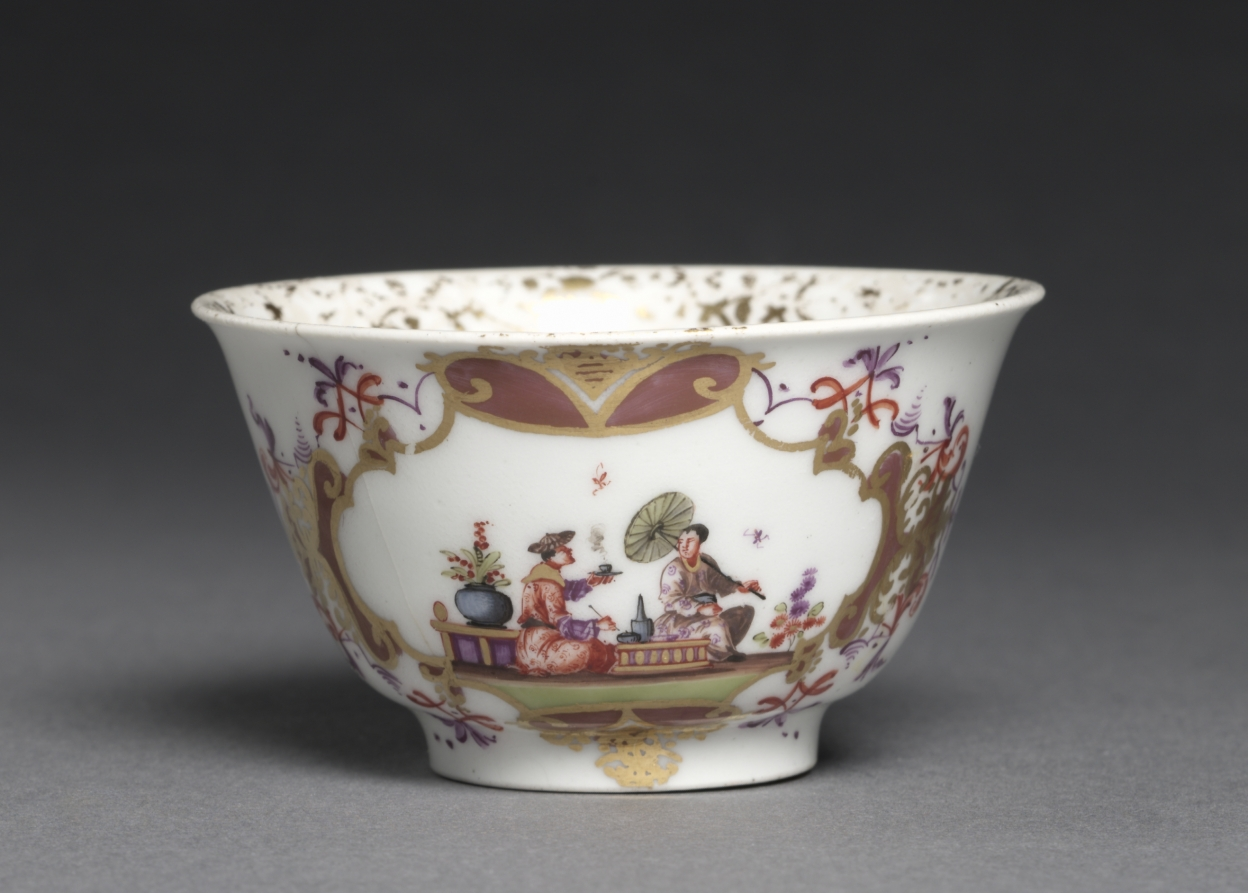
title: Cup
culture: Germany, Meissen, 18th century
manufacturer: Meissen Porcelain Factory (German, est. c. 1710)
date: c. 1725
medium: porcelain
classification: Ceramic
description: About 1725, Herold introduced a new variant of his "chinoiserie" decoration, in which small, full-length figures were depicted against cloudless skies, represented by the now brilliantly white porcelain, within foliate borders of gilt and enamel. This configuration became the standard formula for Meissen figural decoration for the next twenty years, although European subjects came to be depicted with greater frequency toward the middle of the century.